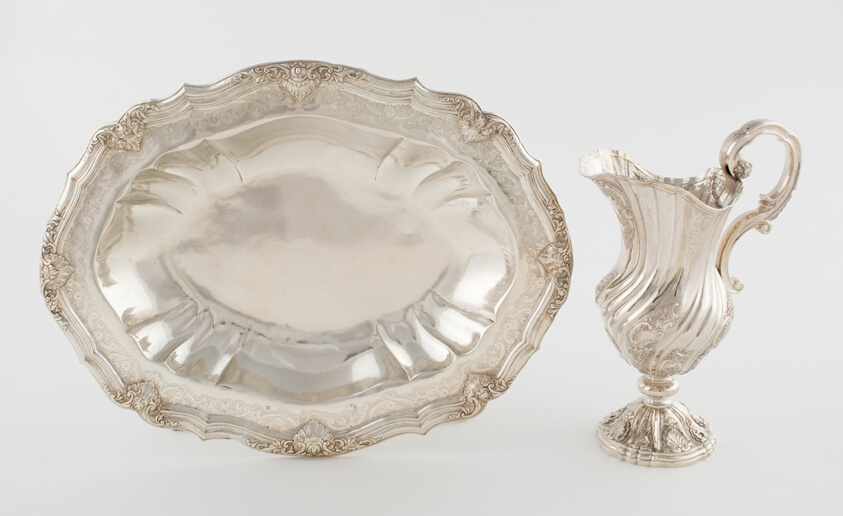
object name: Metalwork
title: Ewer and Basin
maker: Lisbon, Portugal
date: c. 1750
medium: Silver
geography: Lisbon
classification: ewer (vessel); vessel; silver; metalwork; european decorative arts